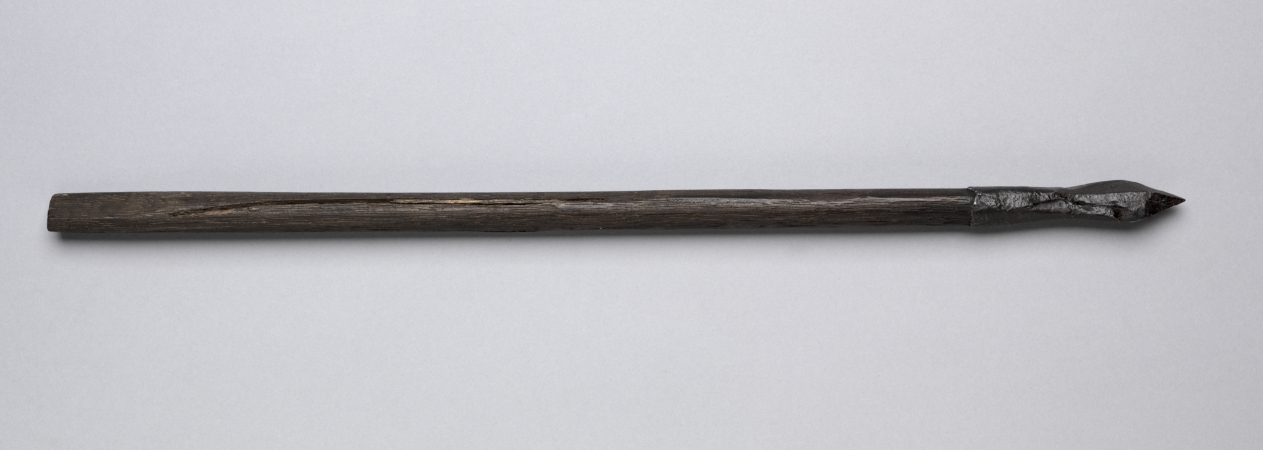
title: Crossbow Bolt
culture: Germany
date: 1500s-1600s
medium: wood, leather, steel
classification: Arms and Armor